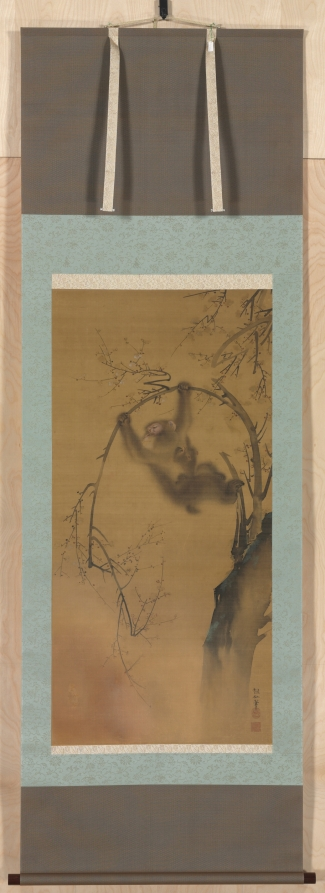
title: Monkeys in a Cherry Tree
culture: Japan, Edo period (1615–1868)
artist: Mori Sosen (Japanese, 1747–1821)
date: c. 1800–1821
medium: hanging scroll, mounted and framed, ink and color on silk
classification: Painting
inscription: signature on right